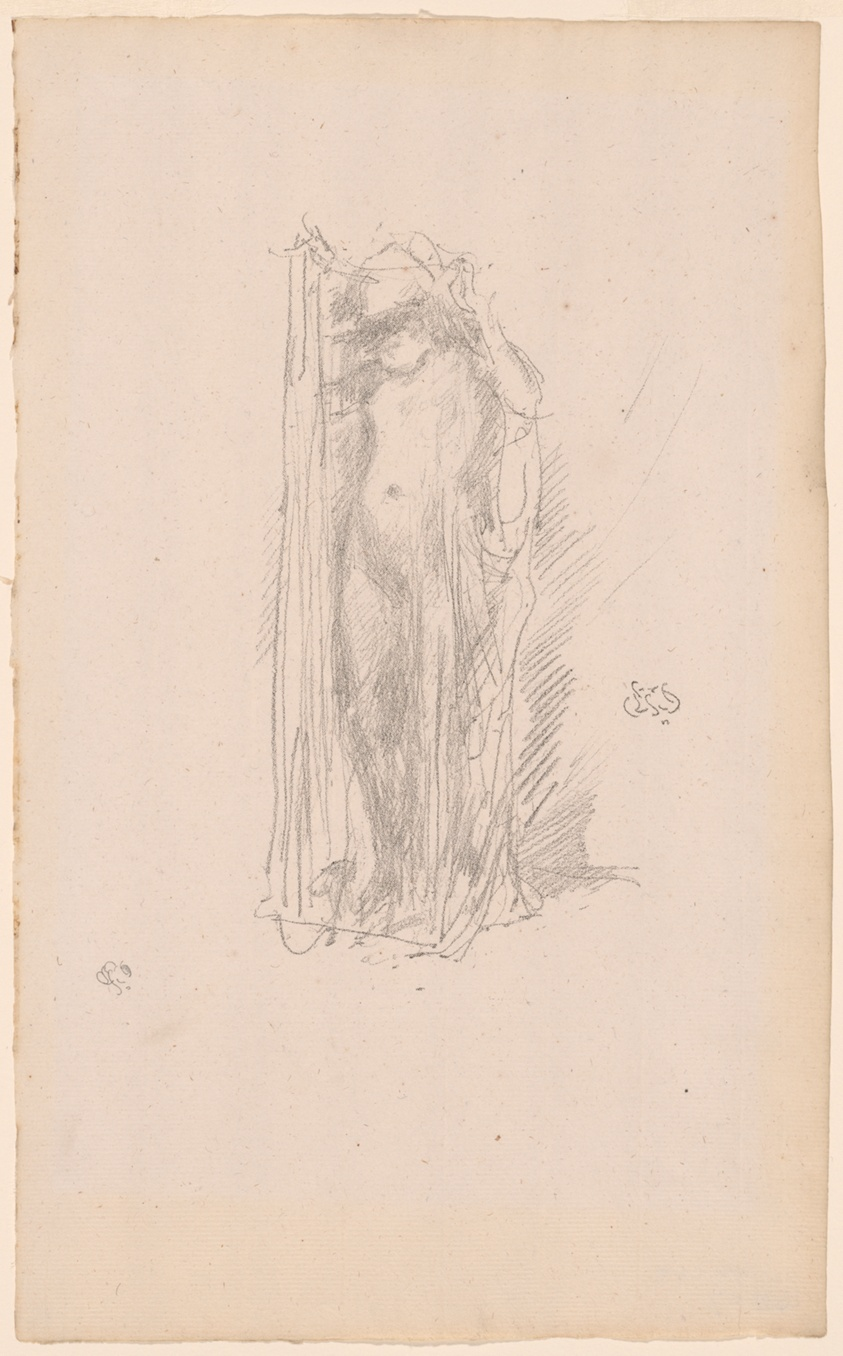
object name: Print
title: Model Draping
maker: Whistler, James McNeill; American, 1834-1903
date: probably 1889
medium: Transfer lithograph in black on cream laid paper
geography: United States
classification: transfer lithograph; lithograph; print; prints and drawing; paper